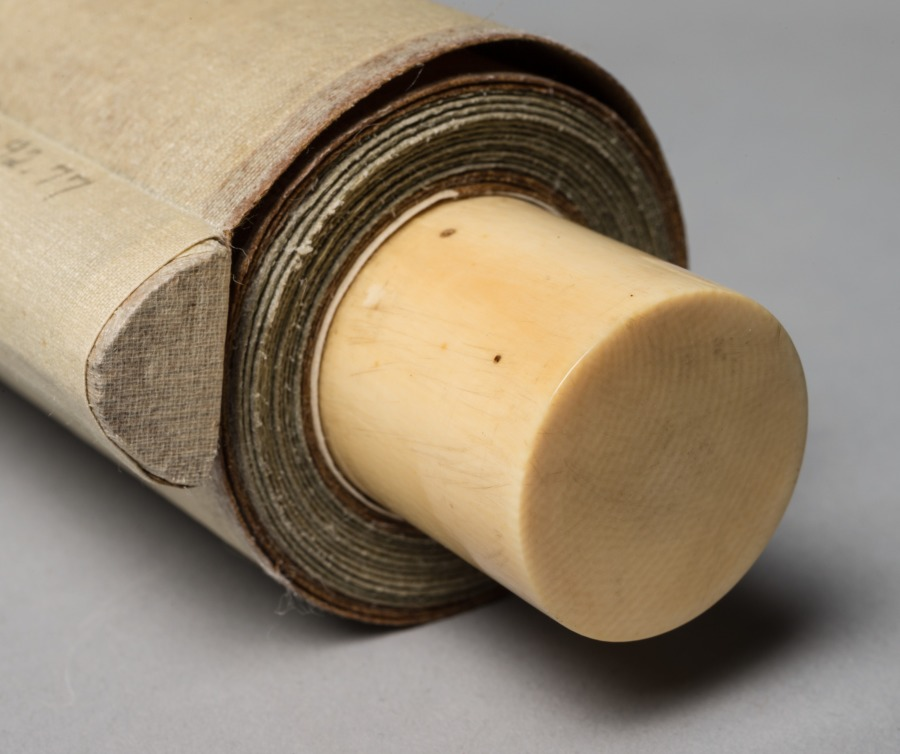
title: Minamoto no Nakakuni Visits Lady Kogō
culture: Japan, Edo period (1615–1868)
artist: Kiyohara Yukinobu (Japanese, 1643–1682)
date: late 1600s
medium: One of a triptych of hanging scrolls; ink and color on silk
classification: Painting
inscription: 款記「清原氏女雪信筆」/「清原女」朱文八角印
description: Kiyohara Yukinobu was one of Japan's earliest and most talented female painters. Kiyohara preferred Japanese style painting techniques and subjects. Her work depicts the scenery and history of her native land. In addition to the tonalities of ink, she applied a delicate range of colors. These help identify the seasons, an important theme in Japanese life and culture.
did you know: This central painting from a triptych presents an episode from The Tale of the Heike in which Minamoto no Nakakuni is sent by the emperor to look for Lady Kogō.